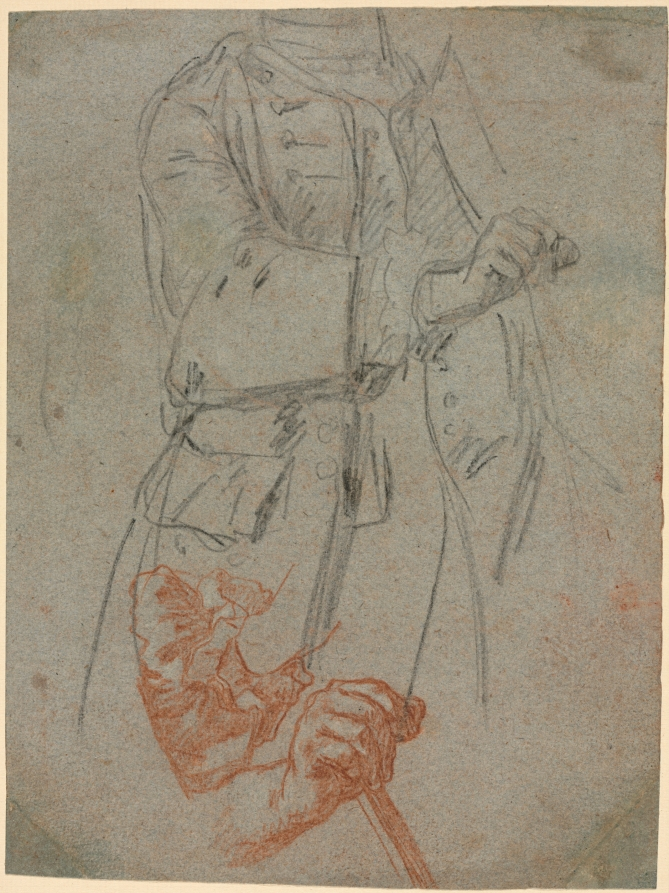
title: Studies of a Costume, Sleeve, and Hand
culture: Italy, 18th century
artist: Pietro Longhi (Italian, 1702–1785)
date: c. 1747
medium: black chalk (costume) and red chalk (sleeve and hand)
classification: Drawing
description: The drawings of the prolific draftsman Pietro Longhi concentrate on the details of costume and gesture to convey the character and social class of his subjects. Here, the artist skillfully exploits black chalk to render the cut of a man’s frock coat and red chalk to simulate the flesh tones of his hand gripping a walking stick.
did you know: Three-piece suits such as the one depicted here were worn all over Europe in the 1700s, with the most expensive made from silk or velvet.